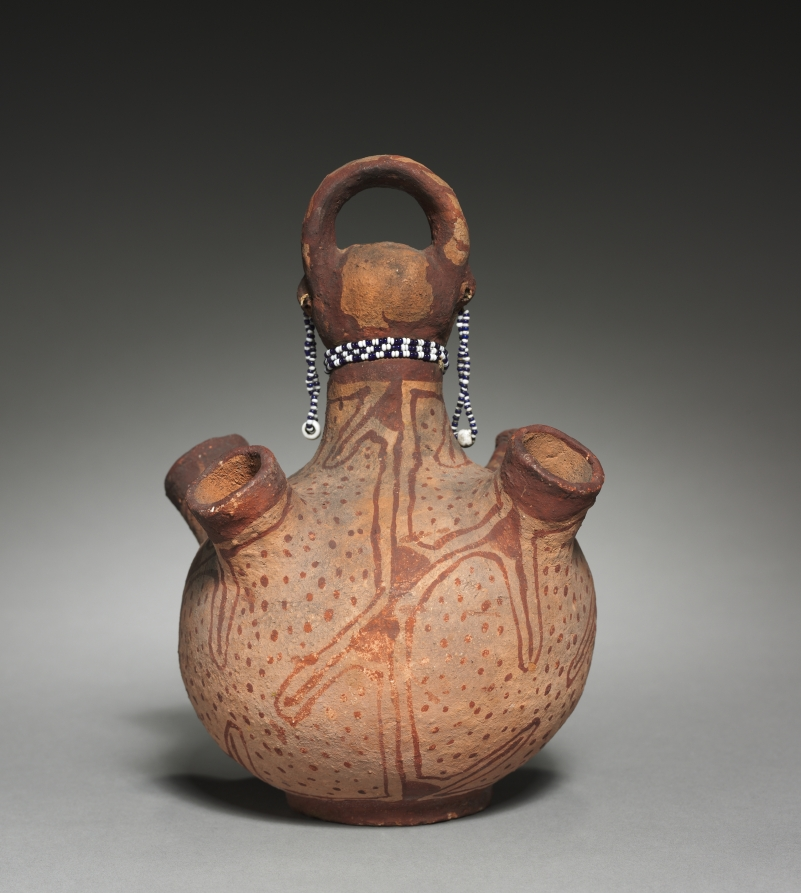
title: Vessel with Four Spouts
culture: Great Basin, Pueblo, Mojave, Post-Contact Period, early 19th century?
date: early 1800s?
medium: ceramic, pigment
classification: Ceramic